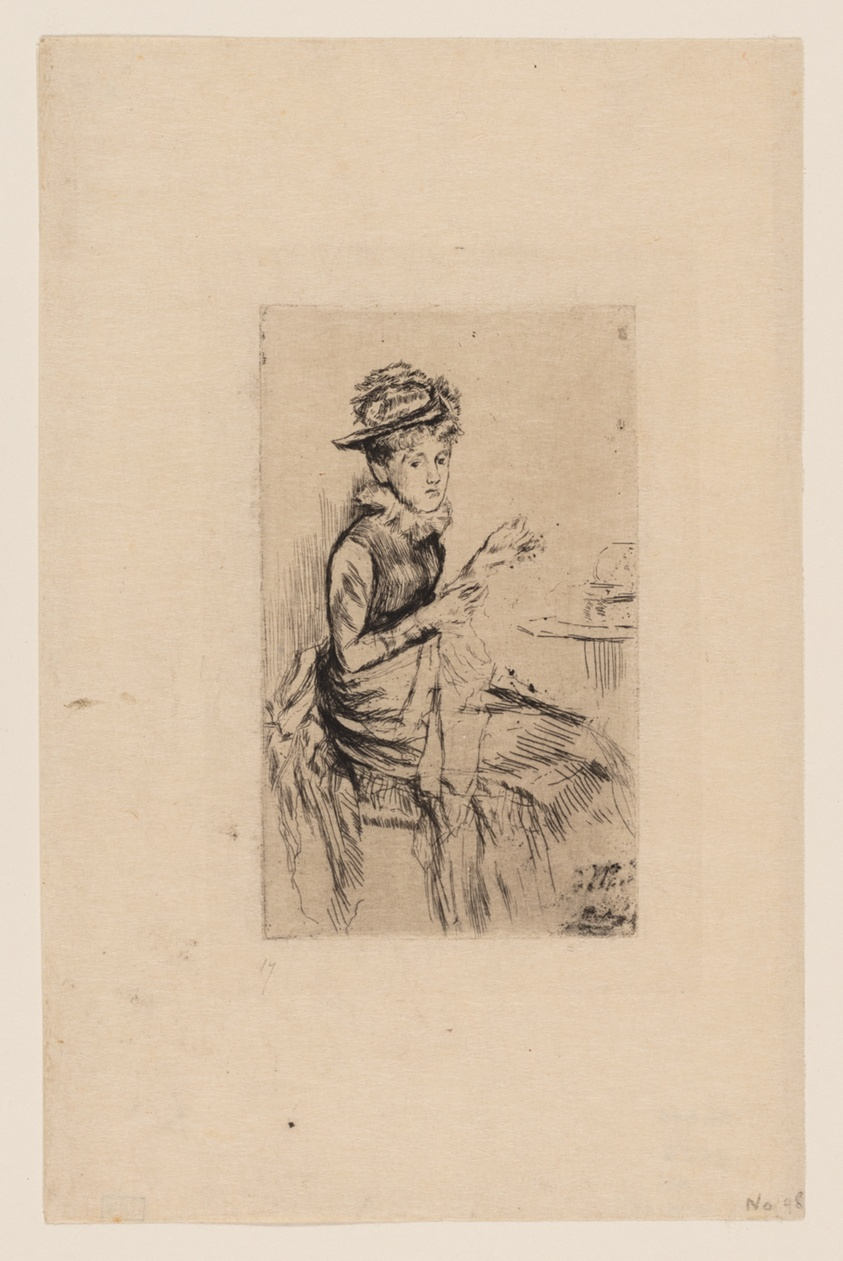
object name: Print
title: Tatting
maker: James McNeill Whistler (American, 1834-1903)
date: 1874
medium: Etching with foul biting in black ink on cream Japanese paper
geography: United States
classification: etching; foul biting; print; prints and drawing; paper